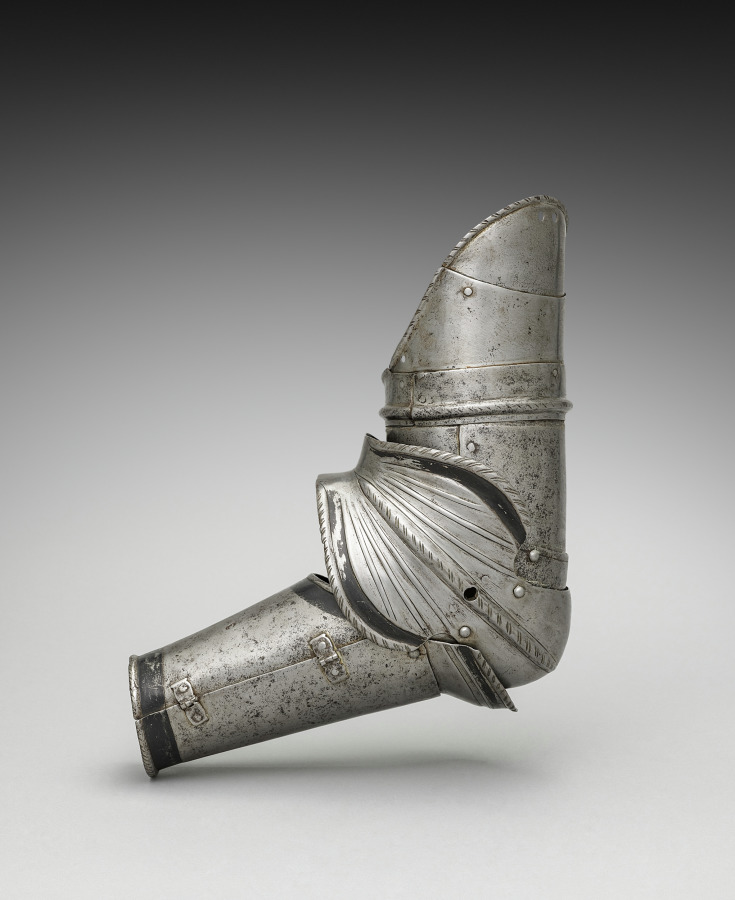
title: Left Vambrace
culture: Germany, 19th century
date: 1801–1900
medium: steel with black paint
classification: Arms and Armor